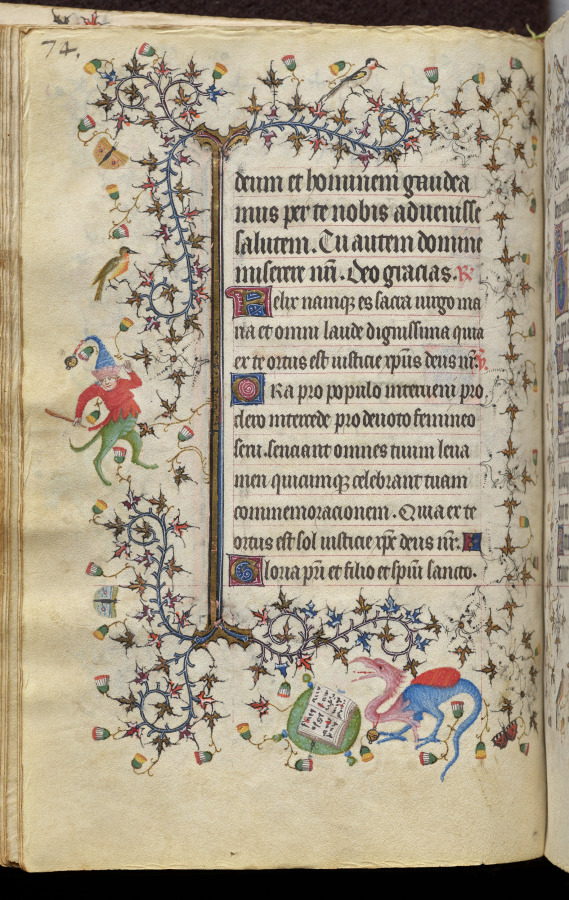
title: Hours of Charles the Noble, King of Navarre (1361-1425): fol. 37v, Text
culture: France, Paris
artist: Master of the Brussels Initials and Associates (French)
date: c. 1405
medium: ink, tempera, and gold on vellum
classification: Bound Volume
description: This precious volume was obviously highly prized by its owner, the French-born King of Navarre, who had his coat of arms painted on no less than twenty folios. Rather than directly commissioning this manuscript from a specific workshop, it seems that Charles the Noble acquired his book of hours -- perhaps ready-made for the luxury market -- while on a trip to Paris in 1404-05. A collaborative effort, six painting styles are evidenced within the pages of this codex, those of two Italians, two Frenchmen, and two Netherlanders. The painter who was responsible for the planning and decoration of the book, and who produced seventeen of the large miniatures, was a Bolognese artist known as the Master of the Brussels Initials. His principal assistant, responsible for most of the borders, was a Florentine who signed his name "Zecho" da Firenze on folio 208 verso.